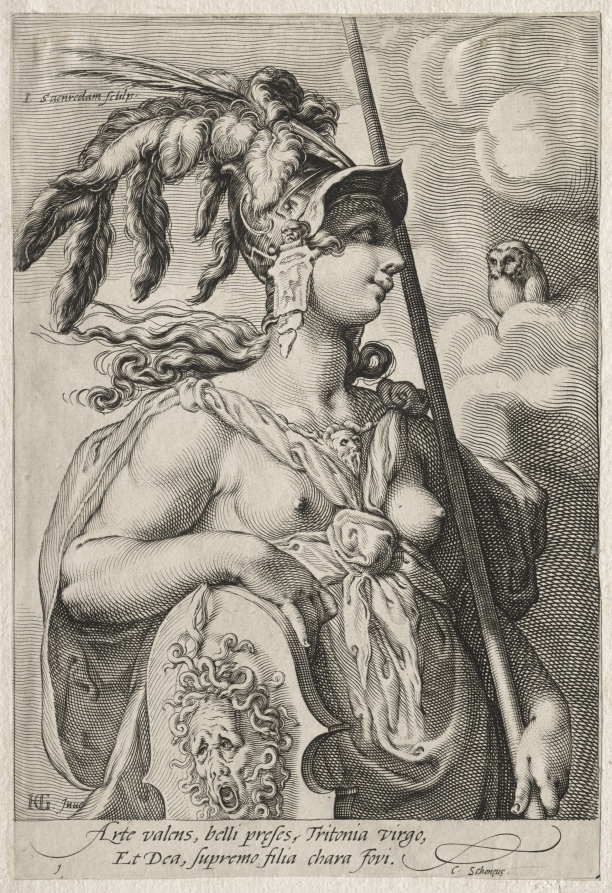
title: Pallas Athena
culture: Netherlands, 16th century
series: Three Goddesses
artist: Jan Saenredam (Dutch, 1565–1607)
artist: after Hendrick Goltzius (Dutch, 1558–1617)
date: c. 1595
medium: engraving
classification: Print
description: Goltzius popularized a style of engraving with mesmerizing patterns of curving, tapering, and crisscrossing lines; it was especially appreciated in the late 1500s. Designed for his pupil Saenredam to engrave, these prints depict the three goddesses from the tale of The Judgment of Paris, in which each claimed the golden apple awarded to the most beautiful. Jupiter deferred judgment to Paris, a mortal esteemed for his fair-mindedness. Juno and Athena tried to bribe Paris with an empire and skill in war, but Venus made him an offer he could not resist: Helen, the world’s most beautiful woman. The peacock identifies Juno, queen of the gods and the jealous wife (and sister) of Jupiter. Clad in armor, Pallas Athena is the goddess of wisdom, the arts, and warfare; an owl is her sage companion. The presentation of the deities in separate prints suggests that viewers may also play Paris’s role and decide themselves which goddess the artists made most beautiful.